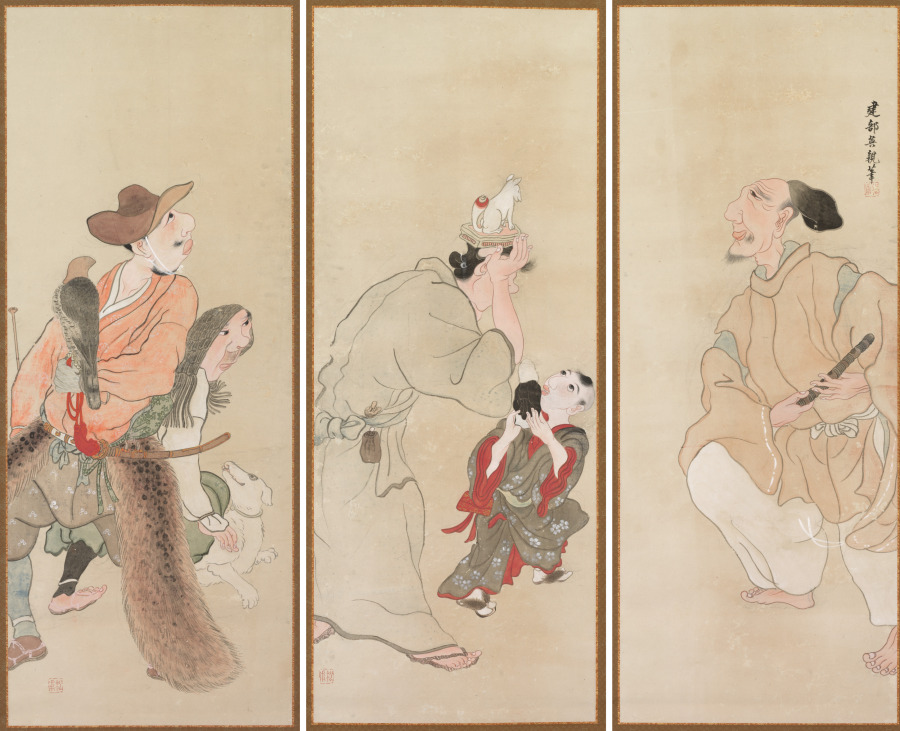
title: Genre Figures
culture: Japan, Edo period (1615–1868)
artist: Takebe Sōchō (Japanese, 1760–1814)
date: c. 1816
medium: Triptych of hanging scrolls; ink and color on paper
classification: Painting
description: Though rarely mentioned in official histories, Socho was an accomplished painter whose talent is readily apparent to the modern eye. For his compositions he chose traditional Japanese stories or everyday events. This painting belongs to a triptych (set of three) that was recently converted from folding screen panels to hanging scrolls.